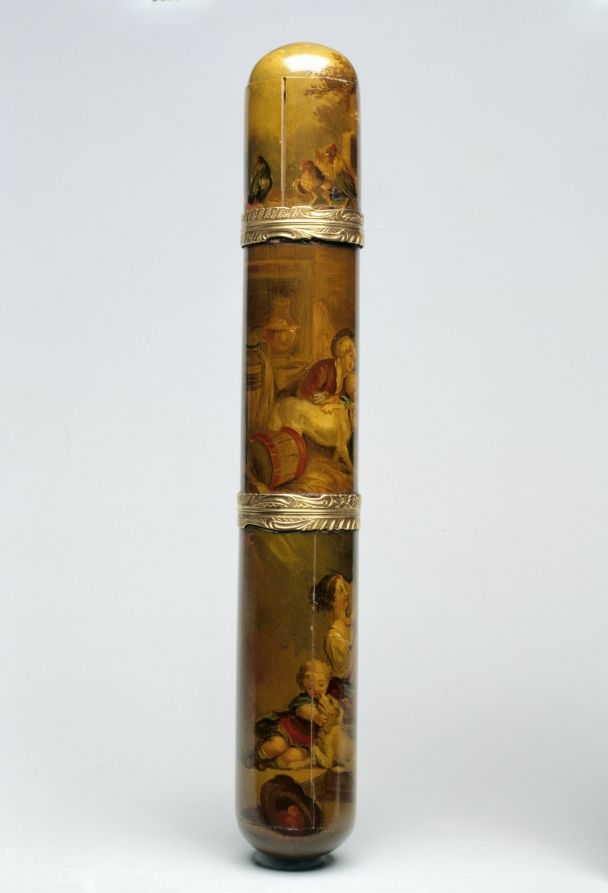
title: Perfume Case (Etui flaconnier)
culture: France, 18th century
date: c. 1780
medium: painted wood with gilt metal mounts, tortoiseshell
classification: Cosmetic Objects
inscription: Unmarked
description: Resting inside this case is a small octagonal crystal flask that would have held perfume. The painted miniatures are decorated with vernis martin, a popular varnish that imitated East Asian true lacquer. These scenes of rural merriment were often miniature reproductions of well-respected artists of the period. The depiction of three children and a dog on the lower portion of the case was drawn from Jean-Honoré Fragonard’s The Happy Family (L’heureuse fécondité) (1777).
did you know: Perfume was an important part of the French toilette, a lengthy ritual of washing and dressing practiced by members of the French social elite.